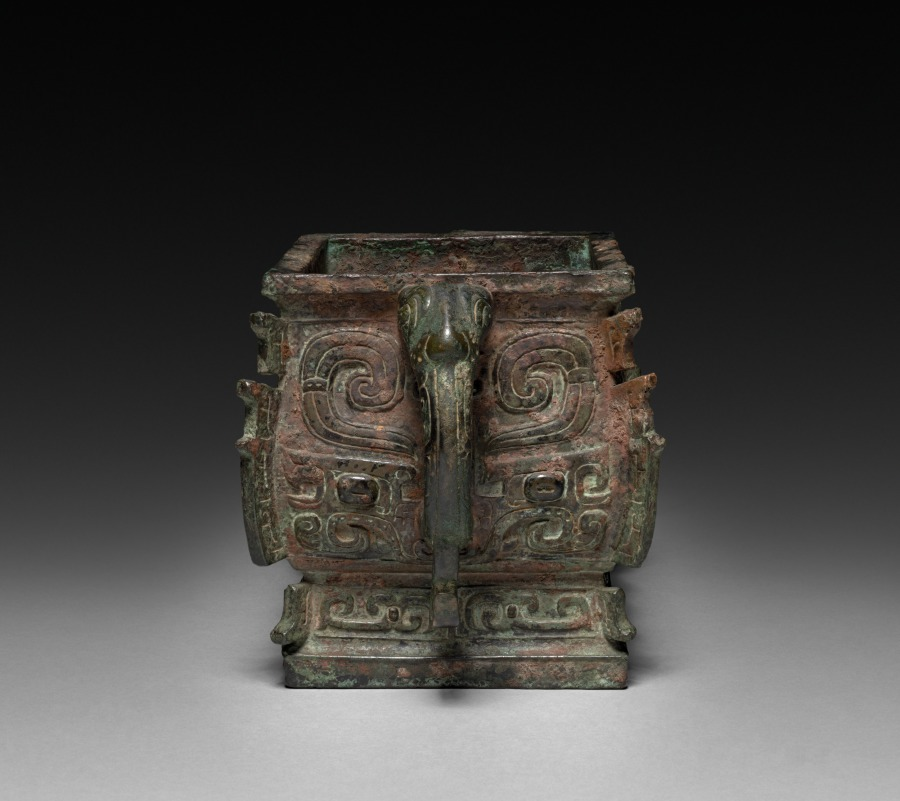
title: Kuei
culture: China, Western Zhou dynasty (c. 1046–771 BCE)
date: 1045–771 BCE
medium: bronze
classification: Metalwork